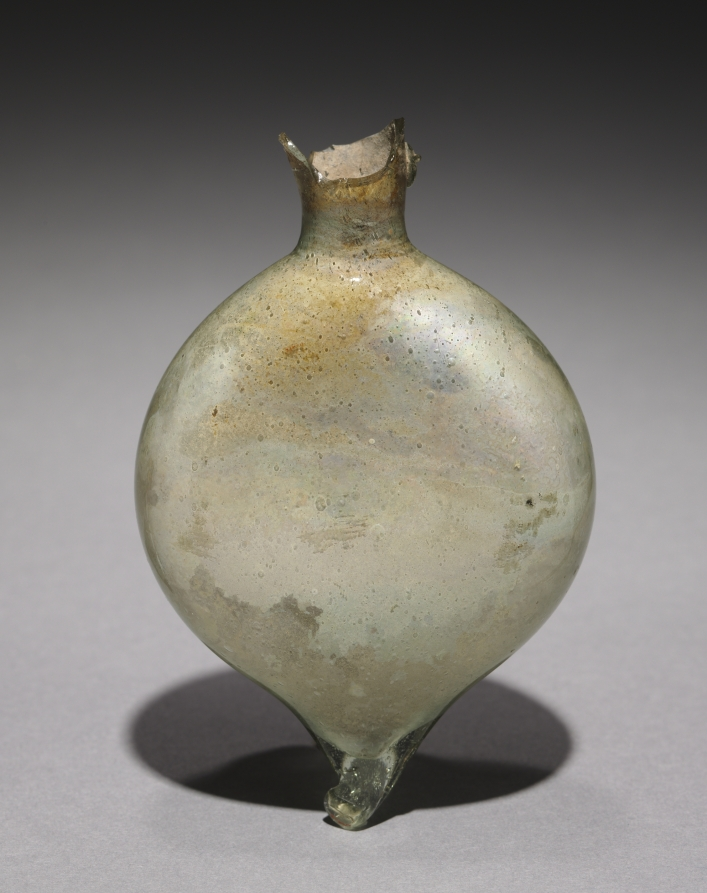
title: Pilgrim's Flask with Nimbed Figure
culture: Byzantium, Syria-Palestine, Byzantine period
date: c. 400–600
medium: opaque glass with paint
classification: Glass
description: Ampullae (small flasks) from pilgrimage sites were made of metal, terracotta, or glass. Because of their fragility, glass ampullae survive less abundantly than the other materials. This example was painted with the image of an unidentified saint bearing a nimbus or halo. It must have been used in conjunction with this saint's shrine.